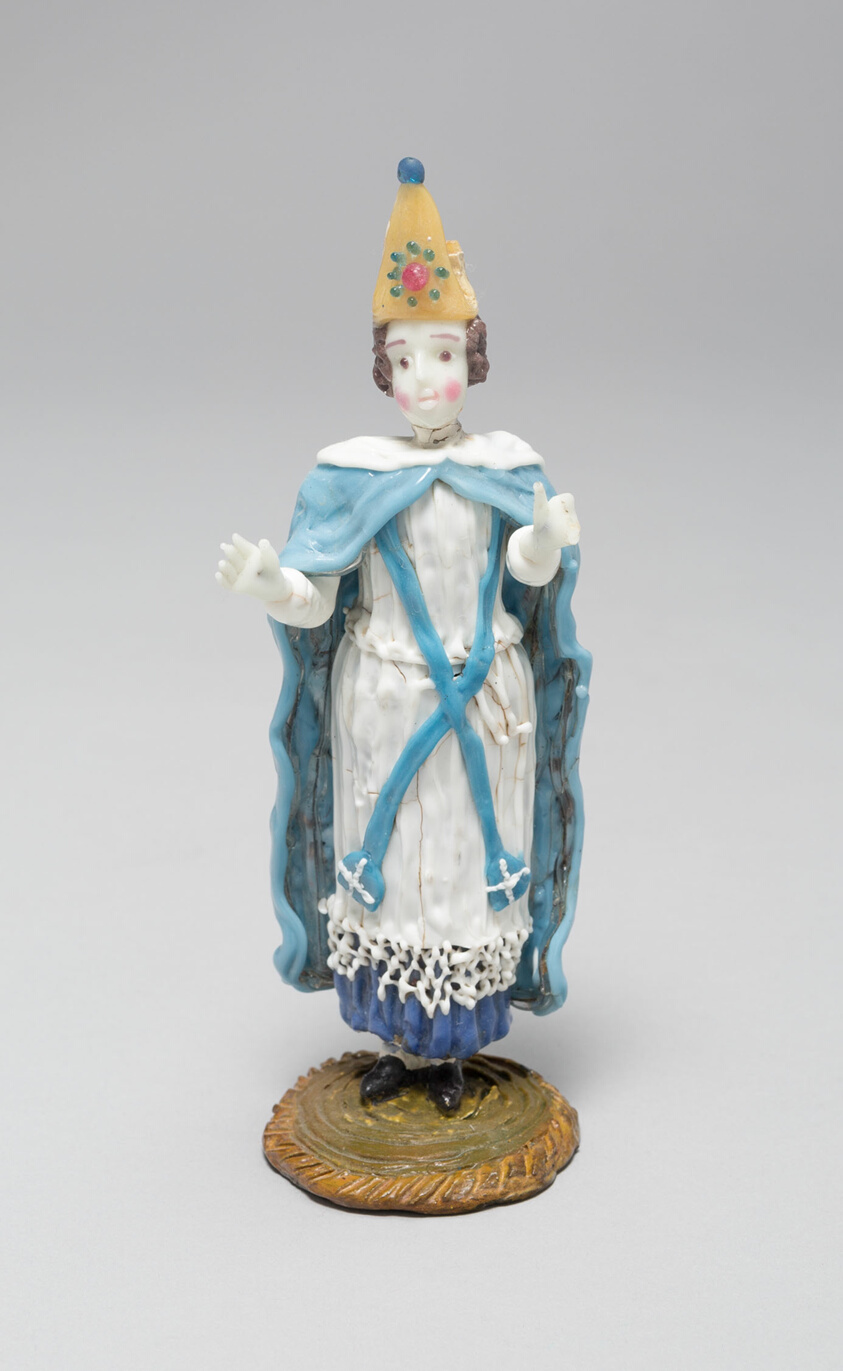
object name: Glass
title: Priest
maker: Nevers, France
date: Early 18th century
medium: Glass; lampwork (verre de Nevers), metal armature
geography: France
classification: decorative object/ornament; lampwork; glass; european decorative arts